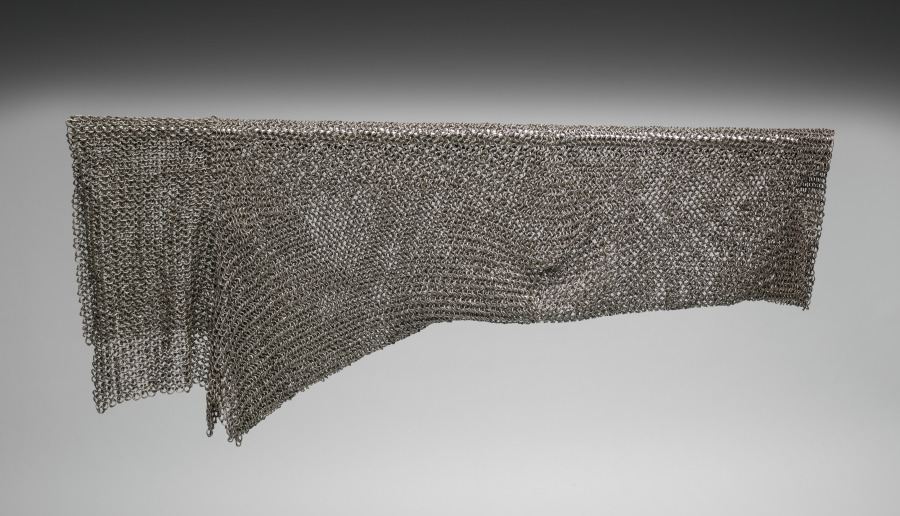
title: Sleeve of Chain Mail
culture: Germany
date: 1500s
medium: steel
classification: Arms and Armor